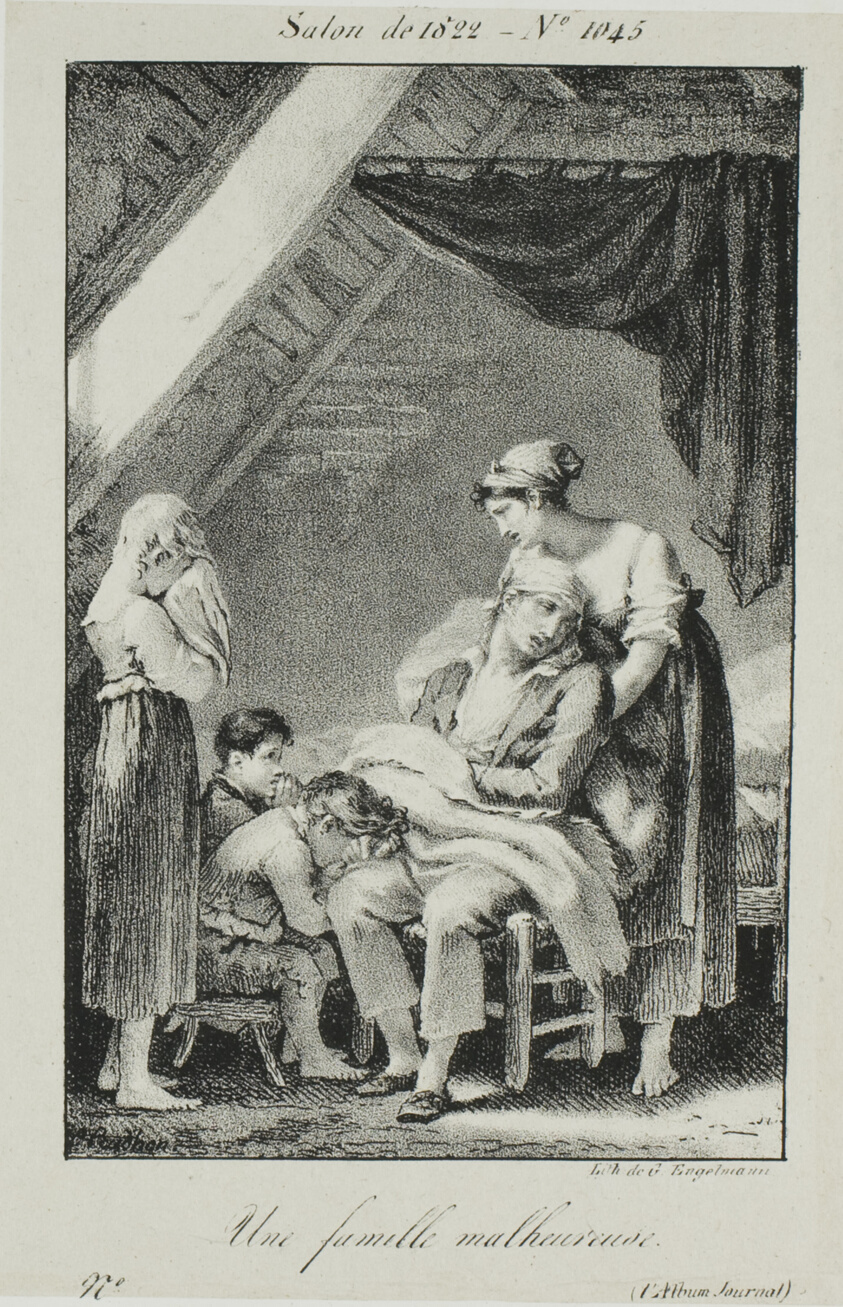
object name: Print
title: A Miserable Family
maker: Pierre-Paul Prud'hon (French, 1758-1823); after Constance Mayer (French, 1774-1821); after Pierre-Paul Prud'hon (French, 1758-1823); printed by Gottfried Engelmann (French, 1788-1839)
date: published March 10, 1822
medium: Lithograph on cream chine, laid down on ivory wove paper (chine collé)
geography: France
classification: lithograph; print; prints and drawing